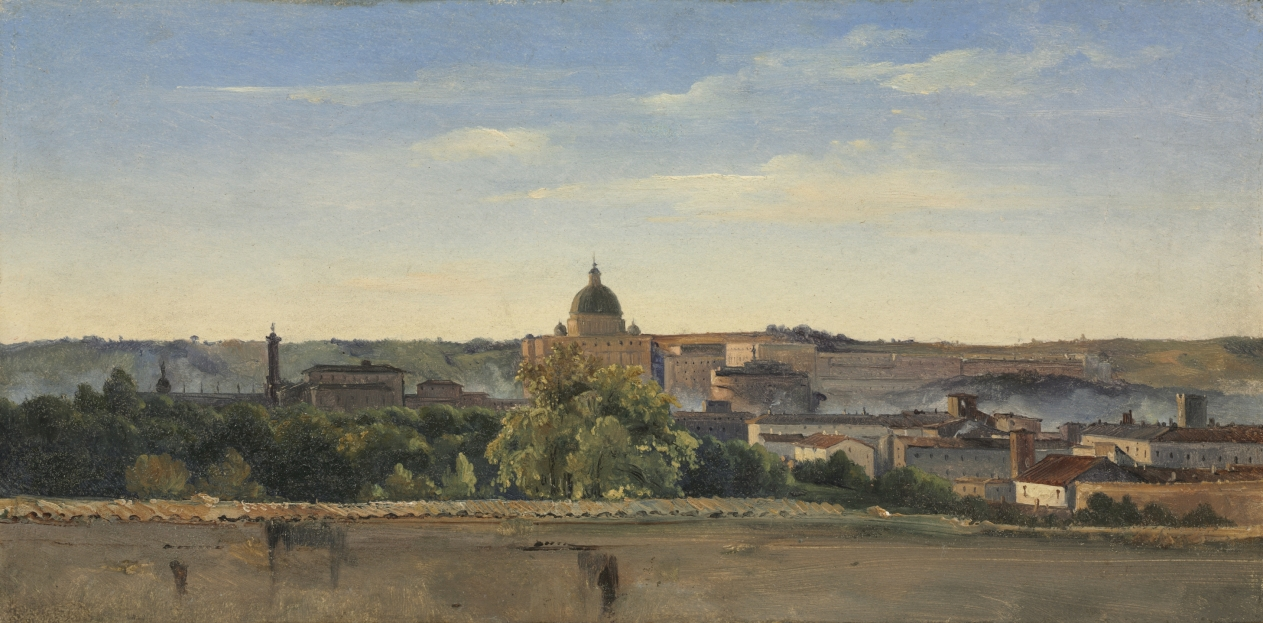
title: View of Rome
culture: France, 18th century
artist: Pierre Henri de Valenciennes (French, 1750–1819)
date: c. 1782–1784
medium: oil on paper, mounted on board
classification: Painting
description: This oil sketch showing St. Peter's Basilica in the distance was painted during the artist's stay in Rome, 1777–85. Its spontaneity and freshness is typical of the artist's outdoor paintings, in which he sought to capture the light and atmosphere of Rome.